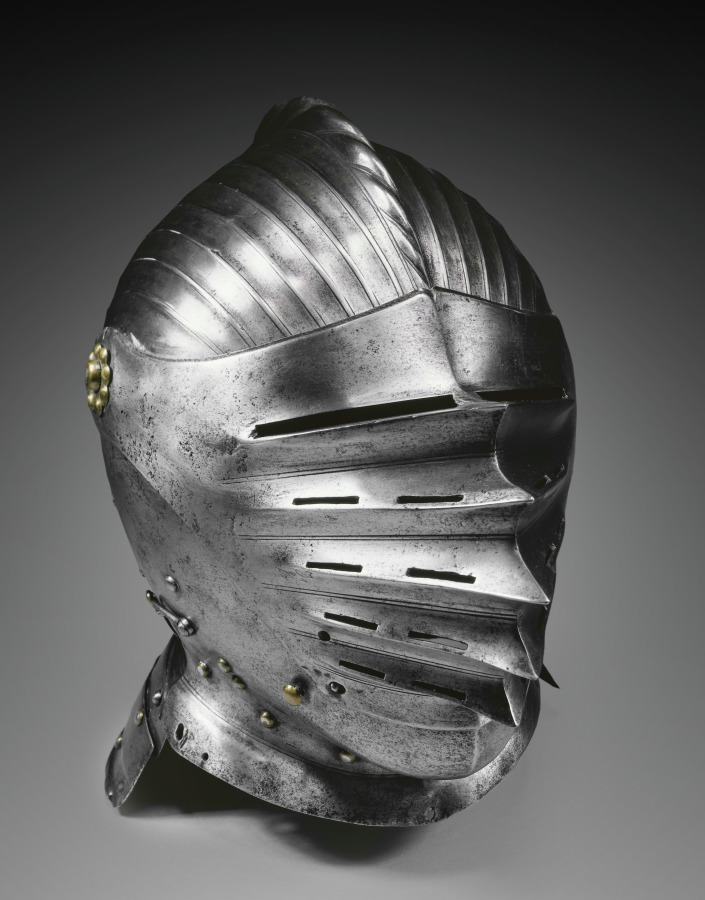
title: Close Helmet in Maximilian Style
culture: Germany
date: c. 1520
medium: steel and brass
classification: Arms and Armor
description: The regular fluting of this helmet is a style known as "Maximilian," named after Maximilian I, Holy Roman Emperor (1493–1519). Besides being decorative the fluting is a strengthening device that works similar to corrugated metal. This decoration would have been costly as it was time consuming to produce and required precise work. It would have only been available to the wealthiest of clients.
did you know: Known as the "Last Knight," Maximilian played a prominent role in this history of armor by building up the armament industry and fostering the modernization of the armorer's craft.